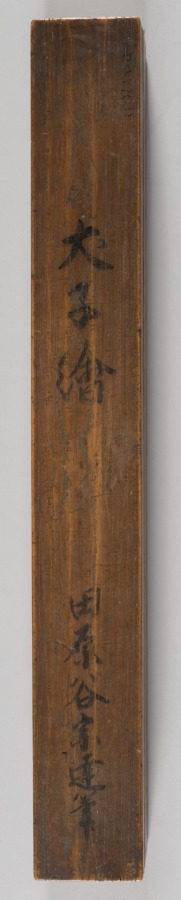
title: Puppy with Dandelions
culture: Japan, Edo period (1615–1868)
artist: studio of Tawaraya Sōtatsu (Japanese, c. 1570–c. 1640)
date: 1600–1640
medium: hanging scroll; ink on paper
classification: Painting